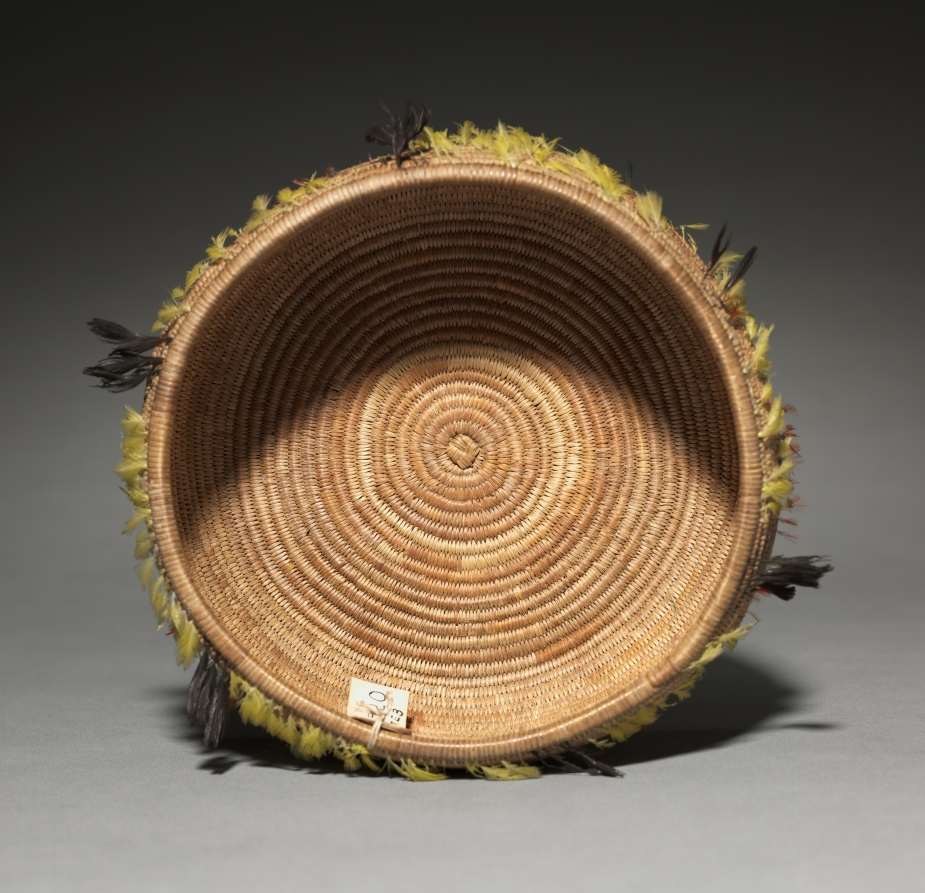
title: Gift Bowl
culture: California, Pomo, Eastern, early 20th century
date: c. 1900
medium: Sedge with Feathers; Coiled (3 rods)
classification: Basketry